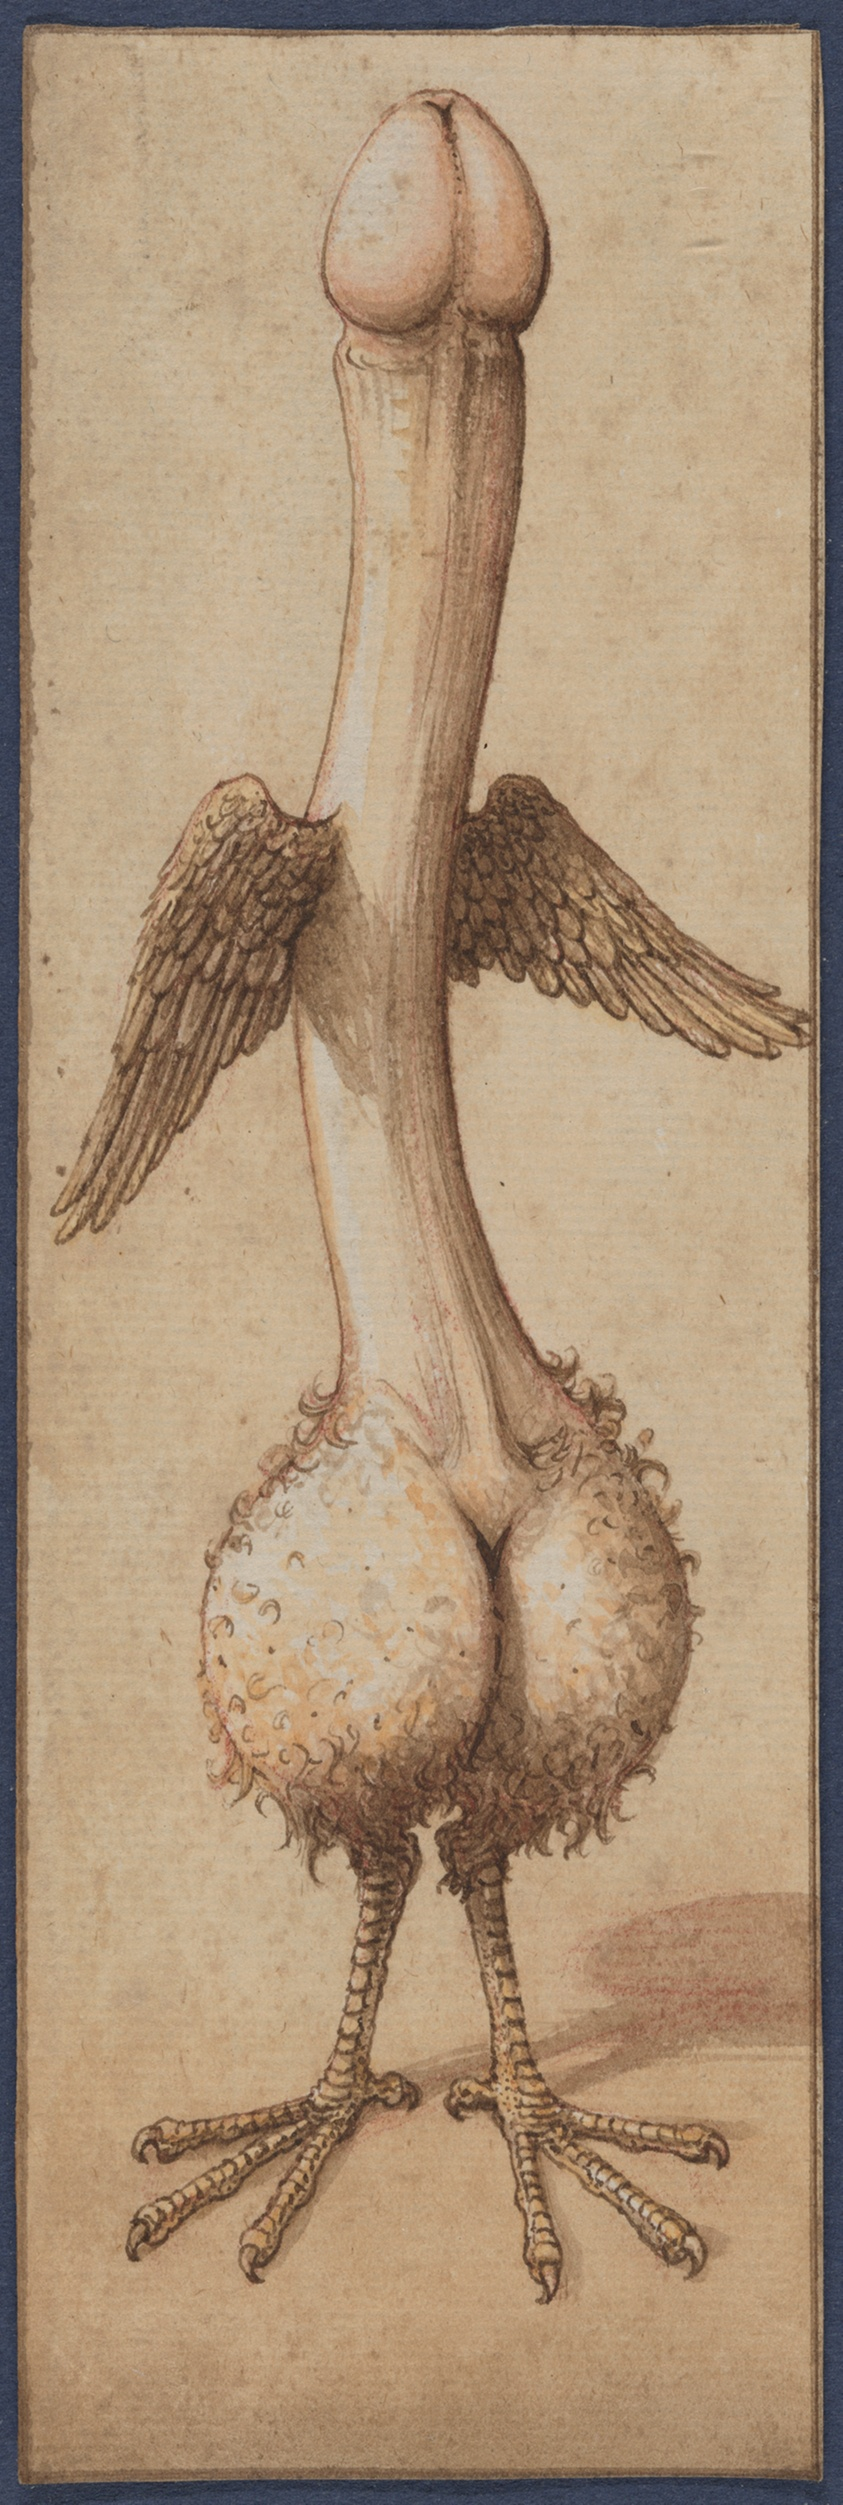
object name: Drawing and Watercolor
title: A Winged Phallus in the Shape of a Bird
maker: Unknown North Italian Artist; Italian, 16th century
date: second half of the 16th century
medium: Pen and brown ink and brush and brown ink wash, with opaque watercolor and traces of red chalk, on cream laid paper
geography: Italy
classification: prints and drawing; brush and wash; drawing; paper; pen and ink drawings